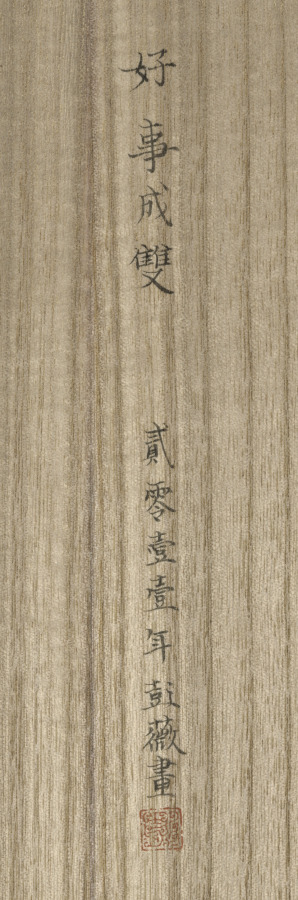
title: Calligraphy with Willow and Swallows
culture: Japan, Muromachi period (1392–1573)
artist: Ikkyū Sōjun (Japanese, 1394–1481)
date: 1400s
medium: hanging scroll, ink on paper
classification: Painting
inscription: How many days has it rid itself of the crow’s cloth? It knows not!/ Lovely is its body so nimble and neat./ Neither men of wealth, courtly position, or power can come close to the unfettered, noble swallow!/ With the coming of spring, it seems to be flying about, dancing around the grass hut of the foolish Priest. signed: Unkasō Isshi Tōkai jun Ikkyū shi ga ippitsu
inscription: outer box inscribed: Ikkyū Ōshō Enshi-zu Jigasan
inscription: inner box side lid inscribed: Showa 50 (1975), November by Tayama Honan with kao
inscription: Inner box side lid inscribed: Ikkyū Ōshō Bokuseki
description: The famed Buddhist monk Ikkyū is best remembered for his calligraphy. Calligraphic conventions of his time called for brushwork that did not vary much in style from character to character. However, as Ikkyū’s lines progress, his brushwork wanders between standard script and a sort of shorthand, marked by an uneven distribution of ink and a reduction of the characters to only the most necessary strokes. Ikkyū’s direct communication of emotion via brushwork became characteristic of the works produced by monks affiliated with the temple Daitokuji later in the Edo period (1615–1868).